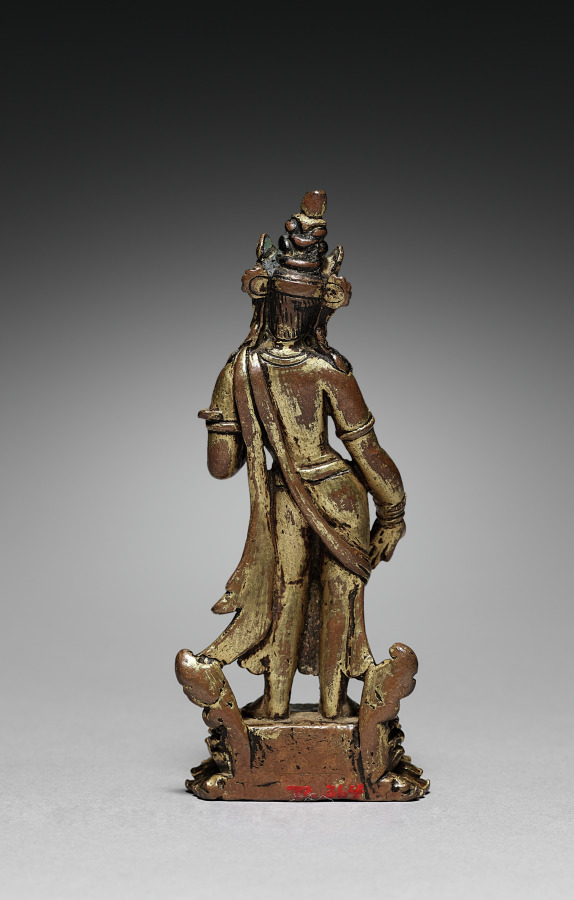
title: Standing Tara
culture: Nepal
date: 1300s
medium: bronze, gilded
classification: Sculpture